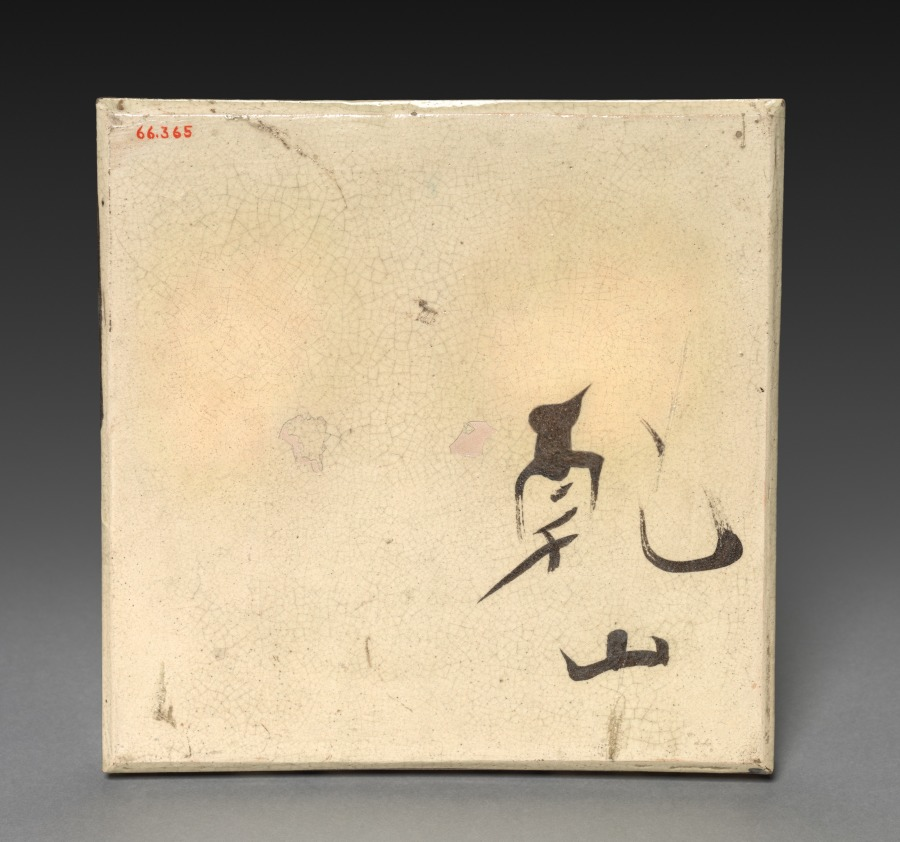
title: Square Dish with Design of Plovers over Waves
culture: Japan, Edo period (1615–1868)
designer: Ogata Kōrin (Japanese, 1658–1716)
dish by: Ogata Kenzan (Japanese, 1663–1743)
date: c. 1700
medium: Glazed stoneware with iron oxide underglaze slip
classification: Ceramic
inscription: design painted by Korin and signed "Jakumei Korin Gaku"; inner and outer faces of four walls probably painted by an assistant at the kiln, underside of dish signed, "Kenzan."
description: The Ogata brothers Kōrin and Kenzan often collaborated on ceramics. This dish is one of a set used for serving tea cakes. Kenzan shaped the dish, after which Kōrin drew the iron oxide design of plovers, a type of shorebird, flying over waves. Kenzan then covered the object with a clear glaze and fired it. Kōrin placed his signature next to his design, while Kenzan signed the back.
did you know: The design of plovers flying over waves derives from Heian period (900s–1100s) literature and later lacquerware designs.